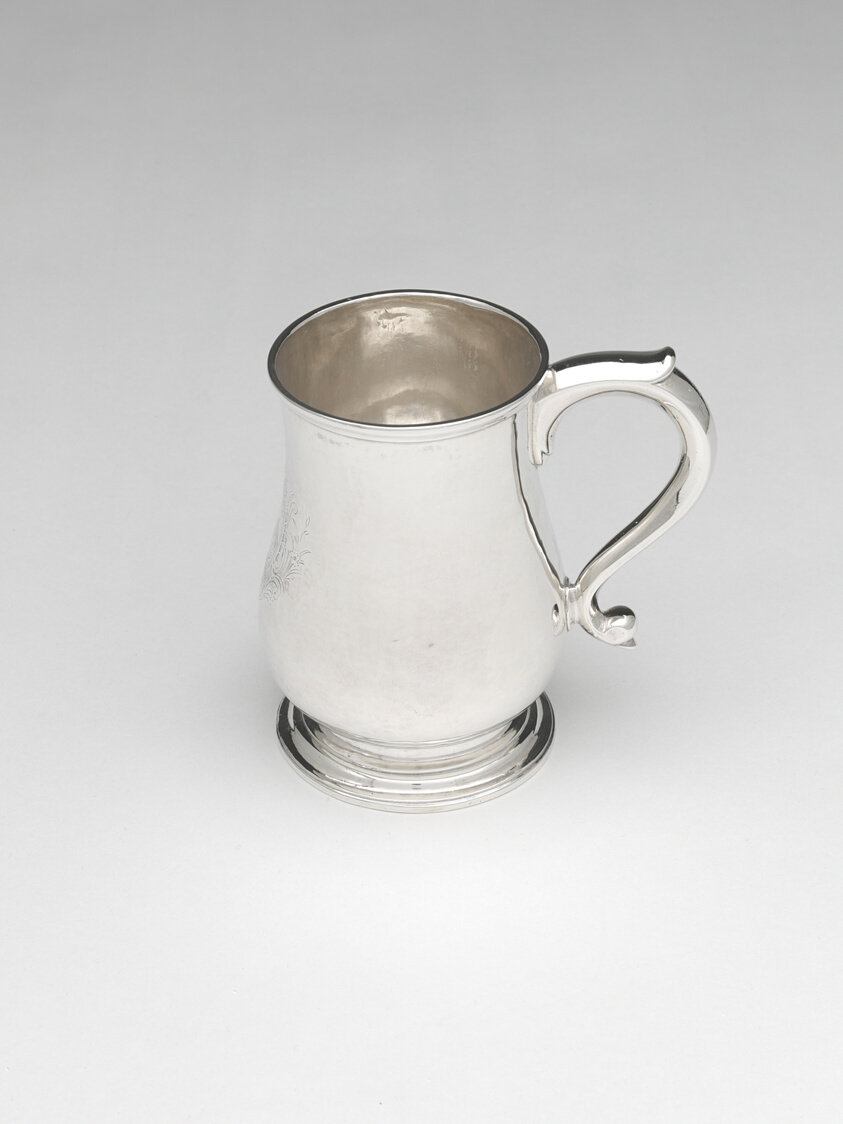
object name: Metalwork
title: Cann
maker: William Cowell Jr.; American, 1713–1761; Boston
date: 1735–50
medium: Silver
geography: Boston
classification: drinking vessel; silver; american decorative arts; american arts; decorative arts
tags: dining, drinking